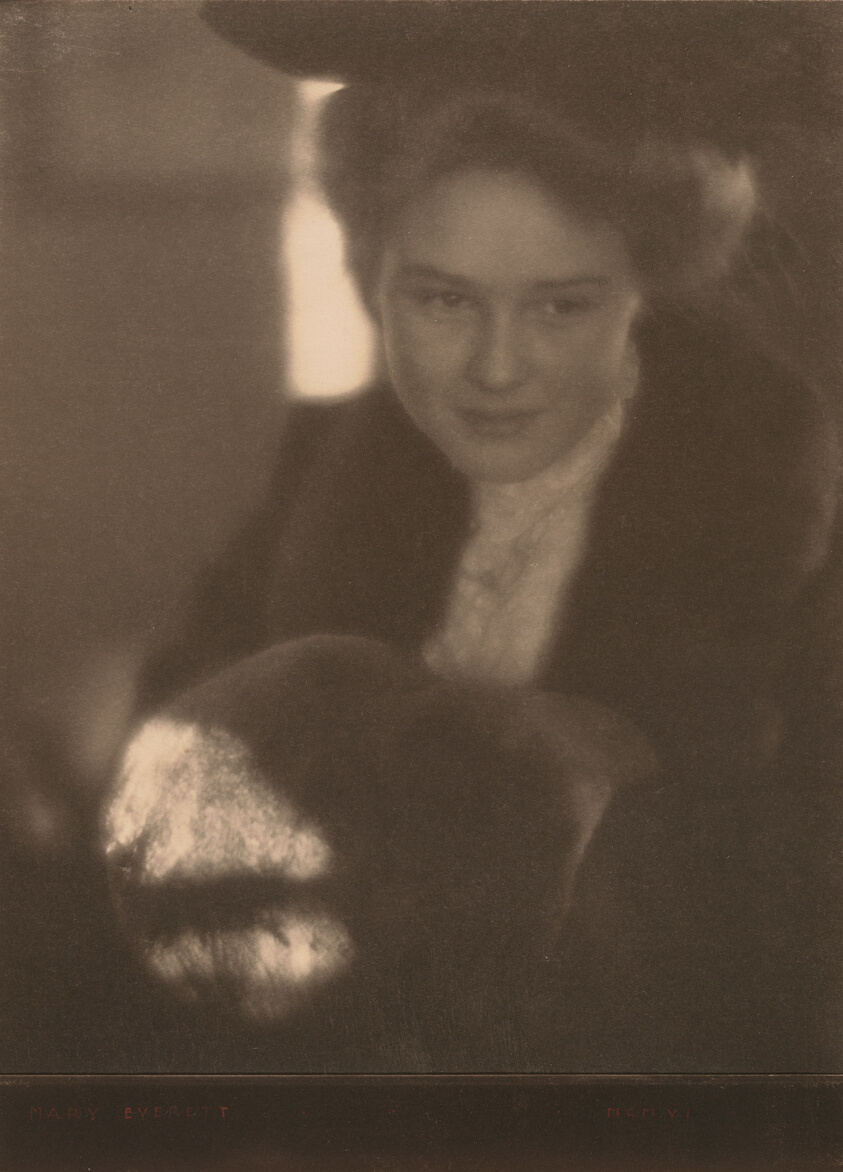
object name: Photograph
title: Girl with Muff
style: Pictorialism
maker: Clarence H. White (American, 1871–1925)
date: 1906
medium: Platinum print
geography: United States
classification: platinum print; photographic process; photography; photograph